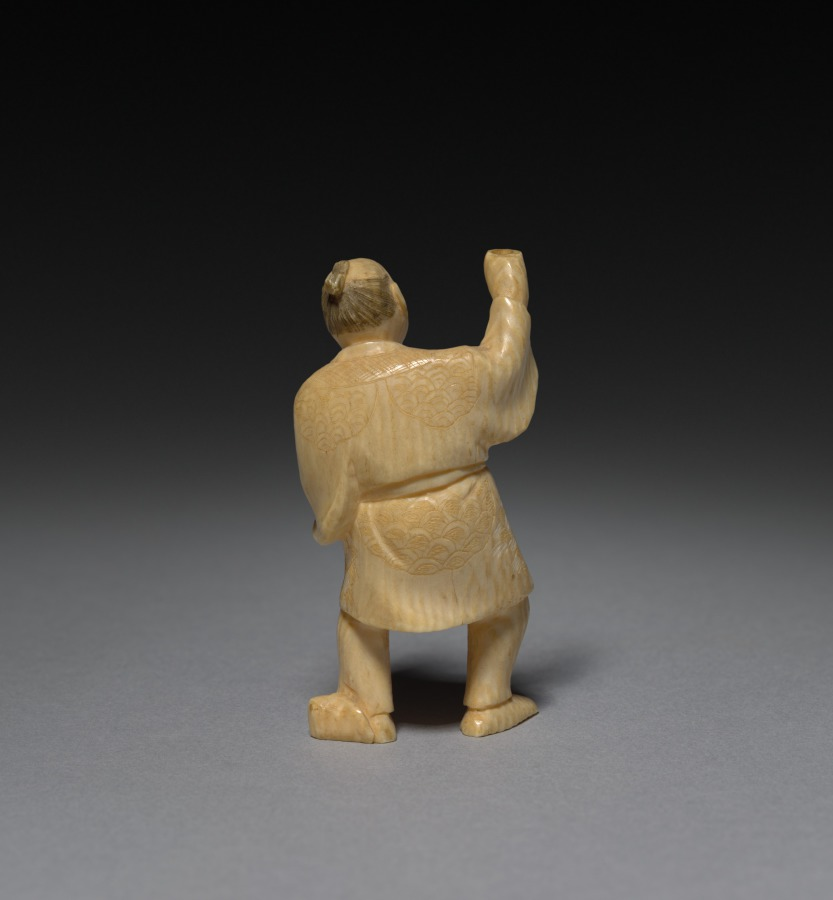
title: Man with Fish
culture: Japan, Meiji period (1868–1912)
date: early 1900s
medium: ivory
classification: Ivory